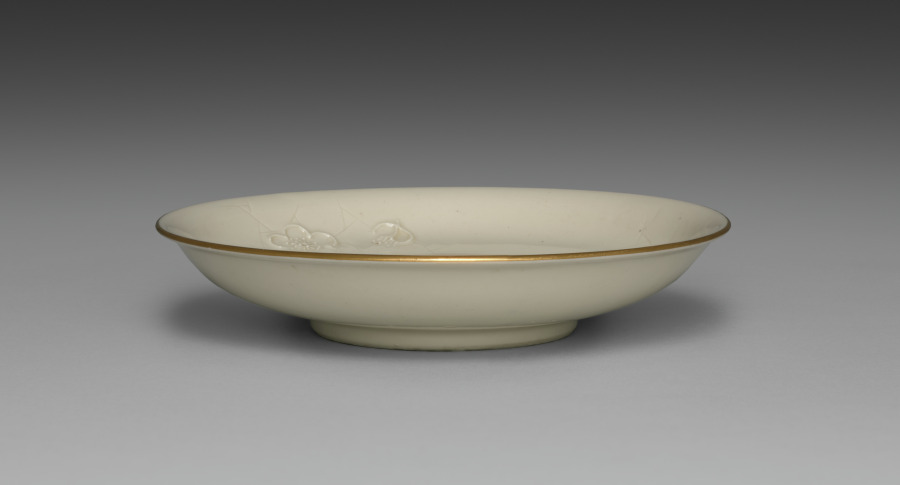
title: Medium-sized Dish from Dining Set with Plum Blossoms and Cracked-Ice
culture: Japan, Meiji period (1868–1912)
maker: Seifū Yohei II (Japanese, 1844–1878)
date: c. 1875–78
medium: Porcelain with molded designs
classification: Ceramic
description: Each item in this set has a delicate low-relief design of flowering plum branches over scattered, intersecting lines meant to resemble the cracked-ice surface of a frozen body of water and is signed on the base in gold pigment. While Yohei II produced many fine works in underglaze blue, like those produced by Kiyomizu Shichibei, he also made works in quite different styles later in his career, from the early 1870 s. In 1873, he was appointed purveyor to the Industrial Center of Kyoto Prefecture, a designation associated with Kyoto’s efforts to reach an international market through the port of Kobe; and from 1875 until his death, he was involved in national-level projects to present Japanese ceramics across the world. It was during this period that Yohei III was apprenticed to Yohei II, and it has been suggested that this set may in fact be an early example of Yohei III’s work, which he signed with his teacher’s name. Decorated with flowers resembling Japanese textile motifs, the set calls to mind the design of Yohei II’s pair of vases with plum blossoms in the Victoria and Albert Museum. Here, the elaborate trees created for a formal public exhibition setting have been translated into the approachable blossoms of the genteel domestic environment. While the designs are consistent across the pieces, each raised flower petal and pistil and each incised line in the ice was done by hand, so the cups, bowls, and dishes are similar yet unique. The bottoms of two boxes once identified the set’s owner, but the information has been deliberately obscured with black ink. However, inscriptions still visible appear to indicate two occasions, once at the end of July 1886 , and once again in June 1916 , when parts of the set were requested from Hokura in Niigata Prefecture. The location corresponds to a neighborhood in the present-day city of Jōetsu. The surname Tsuji 辻 also appears on a paper tag affixed to one of the box cloths. Future research may possibly reveal more about their provenance. A vase by Yohei III in a private collection combines the formal grandeur of the Yohei II vases in the Victoria and Albert Museum with the gentler design of this dining set, placing flowering plum trees against soft, scalloped-edge clouds resembling those in golden screens.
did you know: The dining wares have a creamy white coloration that the four boxes containing them identify as Korean in style.